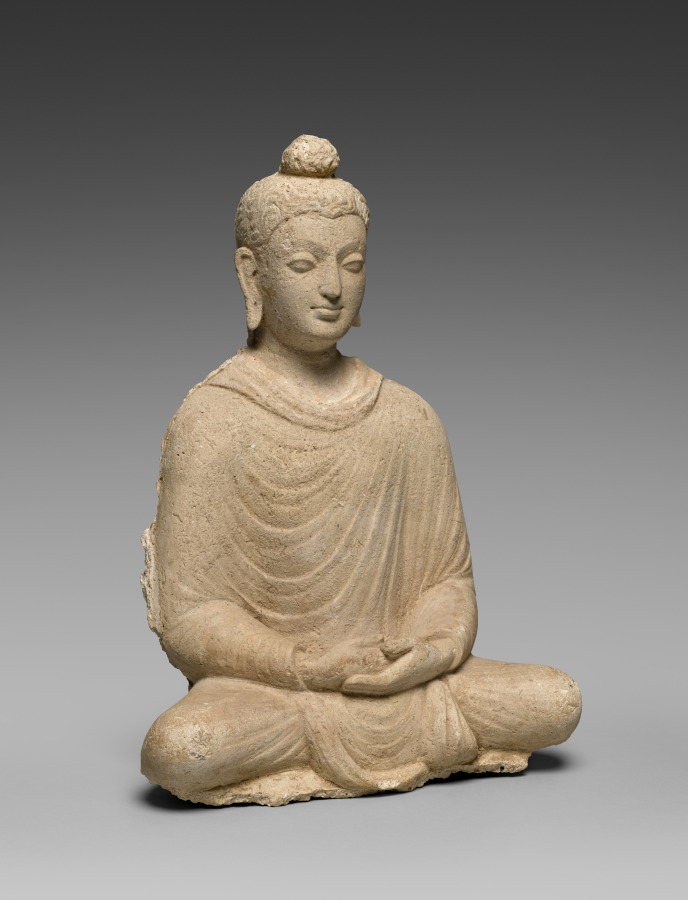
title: Seated Buddha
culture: Afghanistan, Hadda, probably Tape Shotor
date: c. 300 CE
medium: stucco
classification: Sculpture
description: Multiple images of seated Buddhas and related figures surrounded monuments called stupas that enshrined sacred relics. Made of stucco, which is a lime-based plaster material, the backs of the sculptures were fixed to the platform on which the hemispherical stupa was constructed. Visitors would see these images as they venerated the stupas by walking around them reverently, in a clockwise direction. The main stupa at Hadda reportedly contained relics of Shakyamuni Buddha, also known as Siddhartha Gautama, the founder of the Buddhism.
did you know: The way the Buddha holds his hands on his crossed legs indicates that he is shown in meditation.